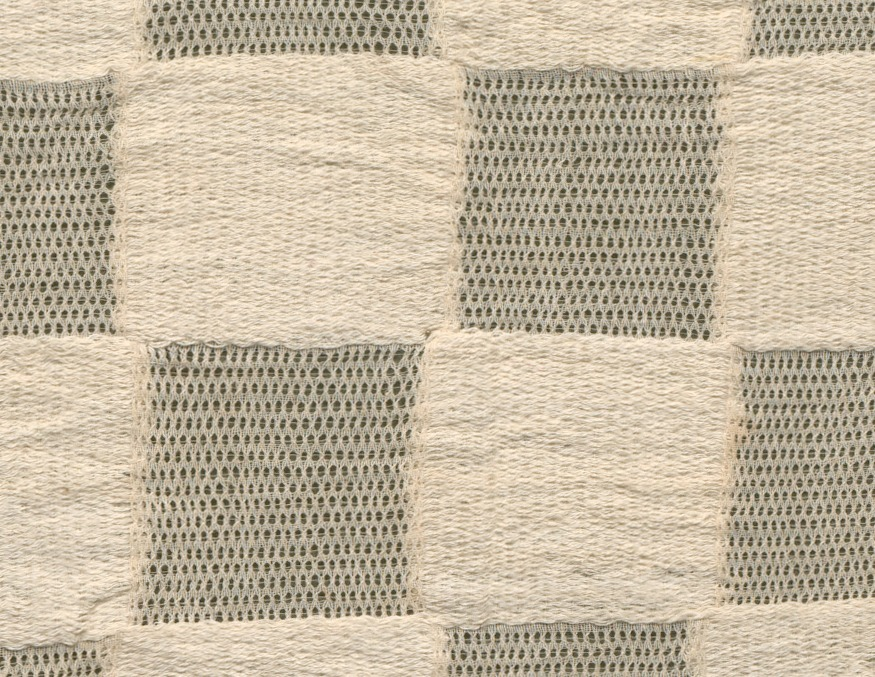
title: Loincloth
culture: Peru, North Coast, Chimú style, 1200–1460s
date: 1425–1500 (radiocarbon date, 92.3% probability)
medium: cotton; plain weave, brocaded and complex alternating gauze with 5 shots of plain weave between gauze shots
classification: Garment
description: Loincloths were basic men’s wear in ancient Peru. But the extraordinary size of some examples—this one is about eight feet long, unfolded—makes it difficult to know how they were worn, except that they were tied around the waist with the decorated panels hanging at the front and back of the body. The appearance may have been that of a billowing skirt.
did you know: This loincloth is huge!